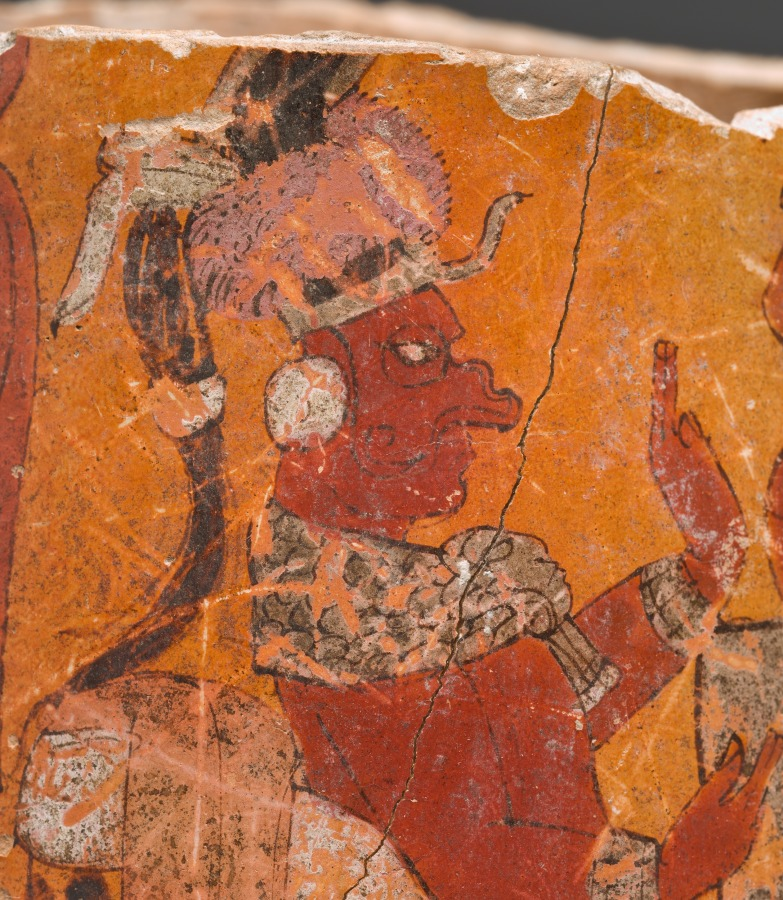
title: Cylindrical Vessel with Palace Scene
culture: Mexico or Central America, Maya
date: 600–900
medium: earthenware with colored slips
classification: Ceramic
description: The scene here may commemorate a special event in the life of a Maya ruler, who stands on a stairway before his throne, his legs framed by a litter on the ground. His gesture and the jaguar pelt at the waist visually unify him with his attendants. The ruler perhaps used the vessel as a drinking cup on important occasions; fine ceramics also served as gifts and as offerings in tombs.